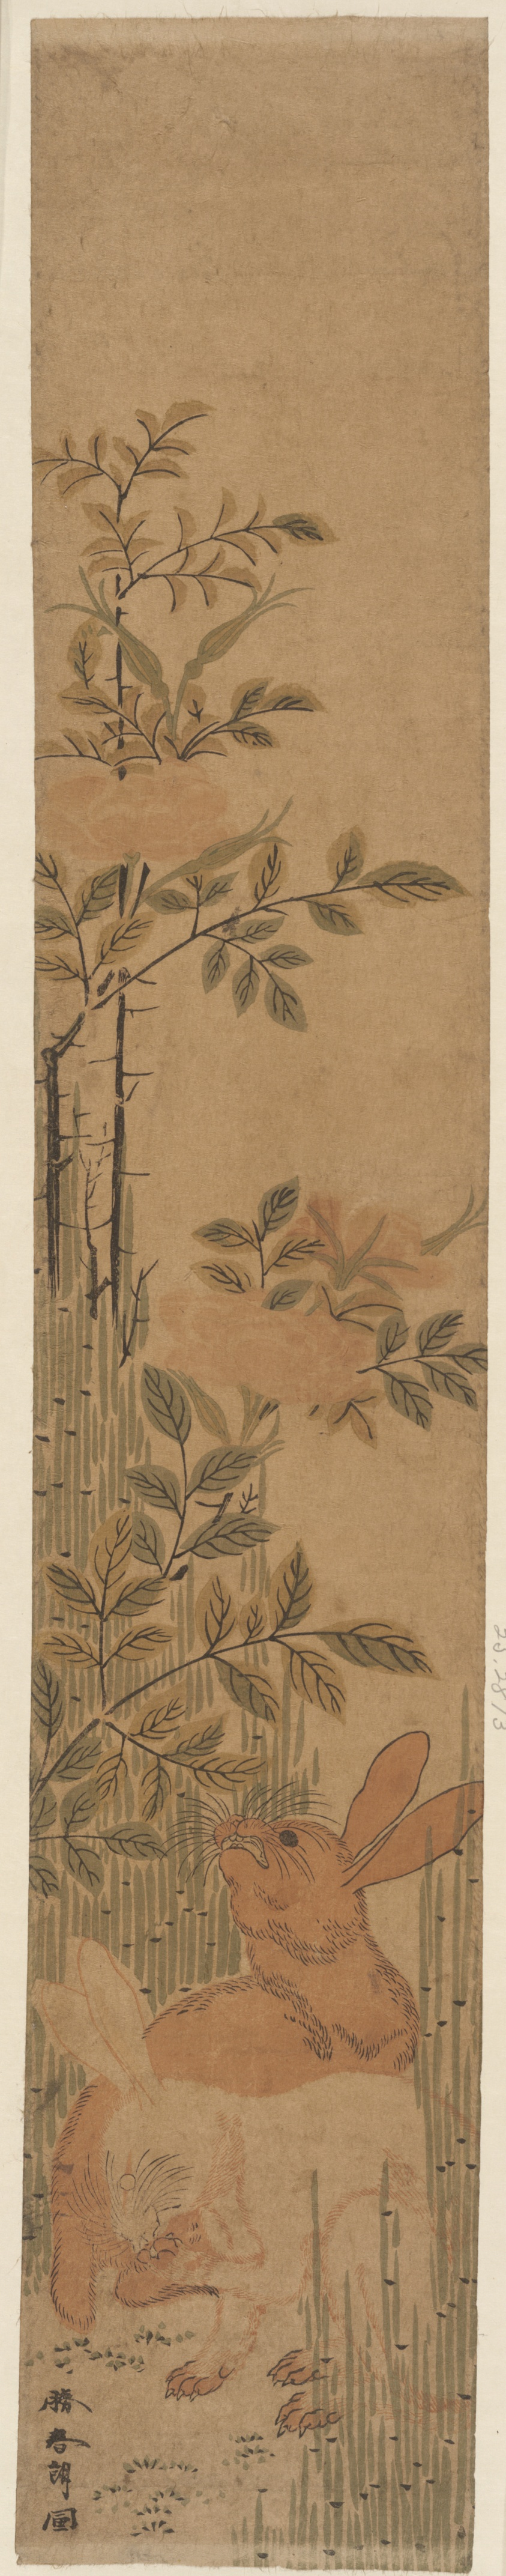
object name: Print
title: Hares and Roses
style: Japanese (culture or style)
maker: Katsushika Hokusai 葛飾 北斎; Japanese, 1760-1849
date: c. 1783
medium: Color woodblock print; hashira-e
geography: Japan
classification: print; asian art